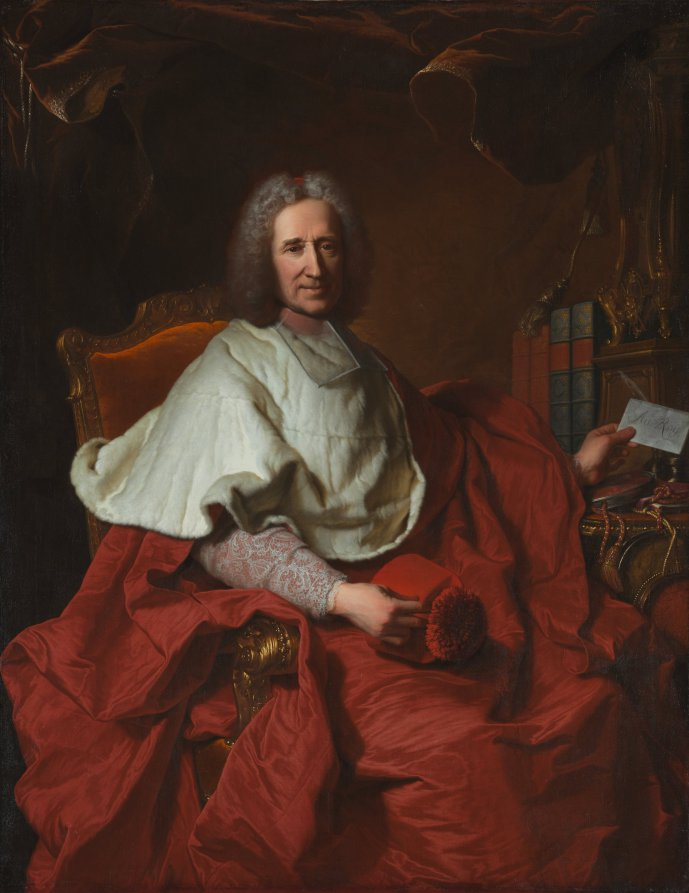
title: Portrait of Cardinal Guillaume Dubois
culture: France, 18th century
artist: Hyacinthe Rigaud (French, 1659–1743)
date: 1723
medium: oil on canvas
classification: Painting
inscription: signed on base of clock: fait par Hyacinthus Rigaud, 1723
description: With his luxurious, flamboyant dress—a voluminous wrap of scarlet silk topped by a short fur cape—the subject of Hyacinthe Rigaud’s portrait was clearly a man of consequence. Guillaume Dubois gained the favor of Louis XIV as tutor to his nephew, Philippe Charles, Duke of Orléans, and served as chief minister under Louis’s successors, the regent Duke of Orléans and Louis’s great-grandson, Louis XV. Dubois was appointed a Cardinal in the Catholic Church in 1721, a lofty aspiration at least partly motivated by political ambition: the title gave him the ability to remove political adversaries with impunity. Dubois holds a letter with the words Au Roy (to the king); this portrait was painted in the same year the young Louis XV ascended to the throne.